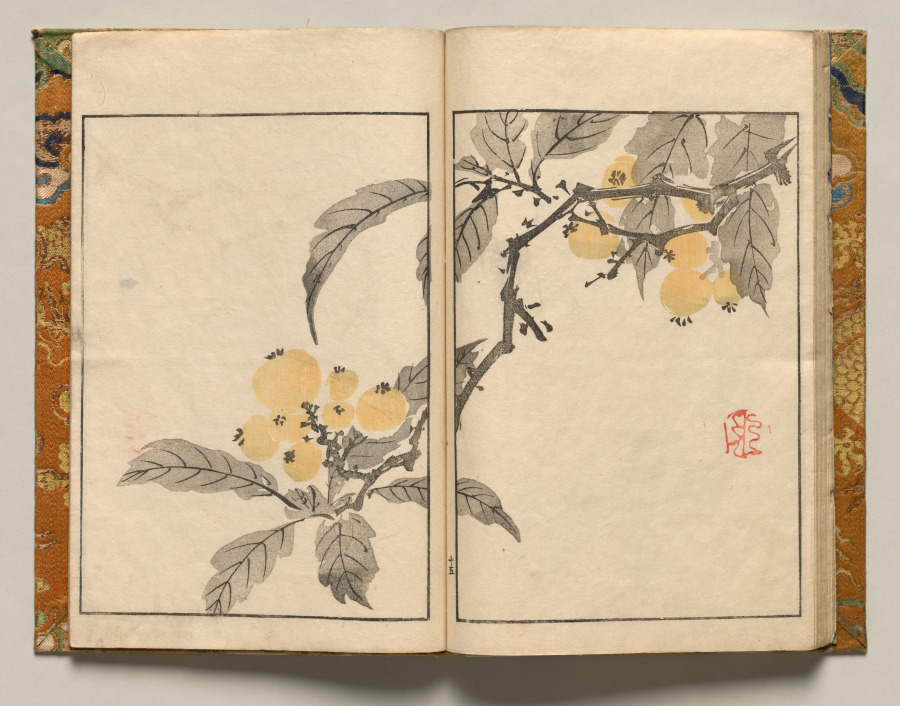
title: Kumquat, Design Fifteen from Shazanrō Picture Book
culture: Japan, Edo period (1615–1868)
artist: Tani Bunchō (Japanese, 1763–1841)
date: 1816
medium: woodblock-printed book; ink and color on paper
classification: Bound Volume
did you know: Shazanrō was one of Tani Bunchō's style names.